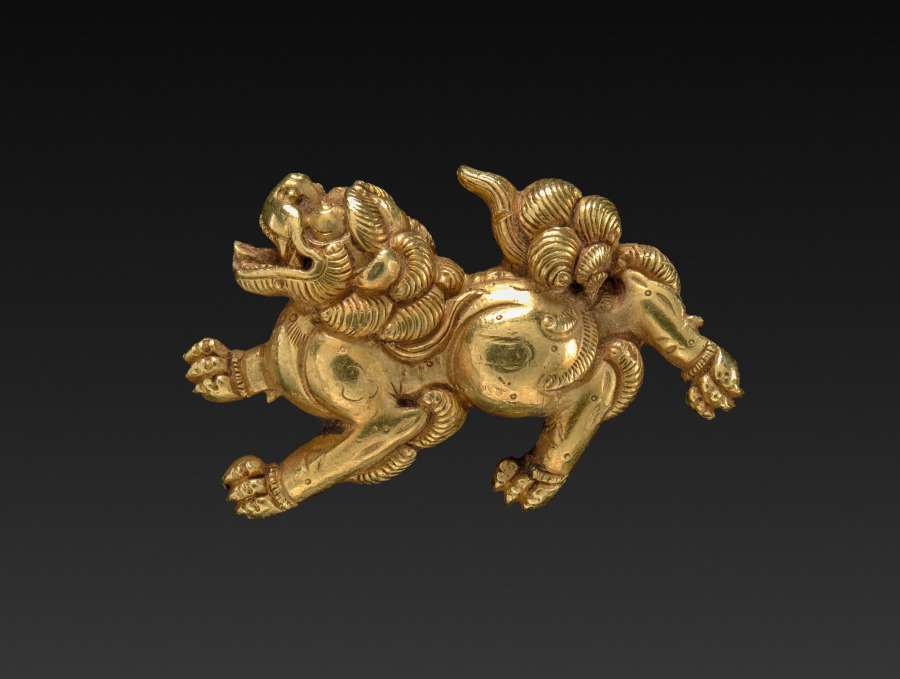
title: Lion-shaped Sword-Grip Ornament (Menuki)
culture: Japan, possibly Edo period (1615-1868)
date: c. 1615–1868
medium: gilt bronze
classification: Metalwork